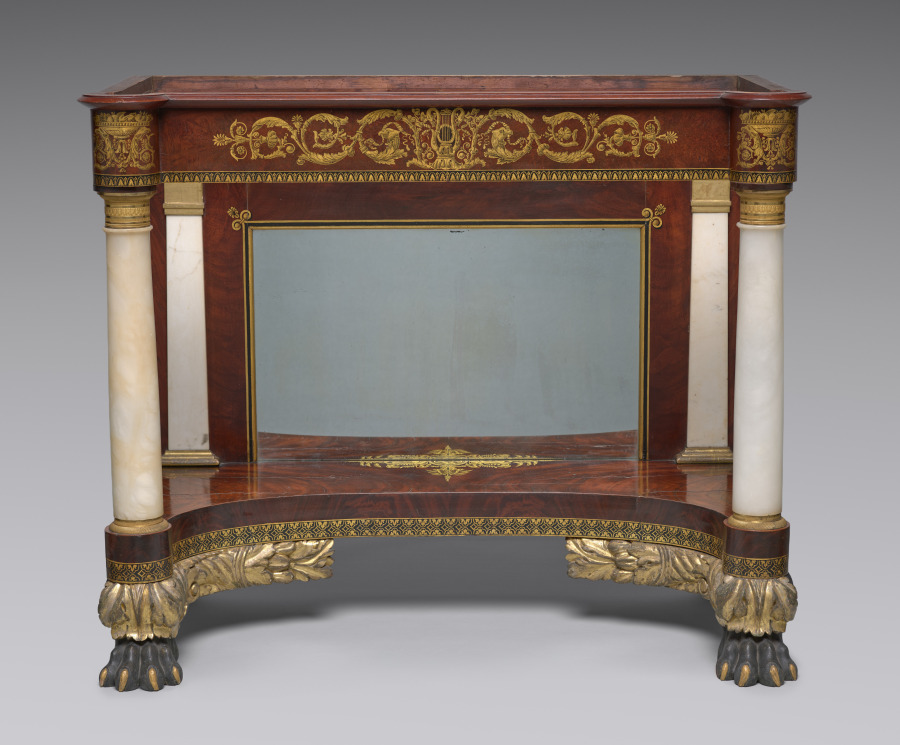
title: Pier Table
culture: America, New York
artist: Joseph Meeks and Sons (American)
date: c. 1829–35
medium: mahogany; marble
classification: Furniture and woodwork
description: Ornamental tables such as this marble-topped example were most often used in rooms on a narrow wall between two windows or just across from them on an opposite wall. Usually a gilded mirror hung above the table to create a single pier of glass, top to bottom, which reflected light around the room. This table’s bold use of carved and stenciled decoration, as well as expensive white marble, indicate that it was owned by a very wealthy family.